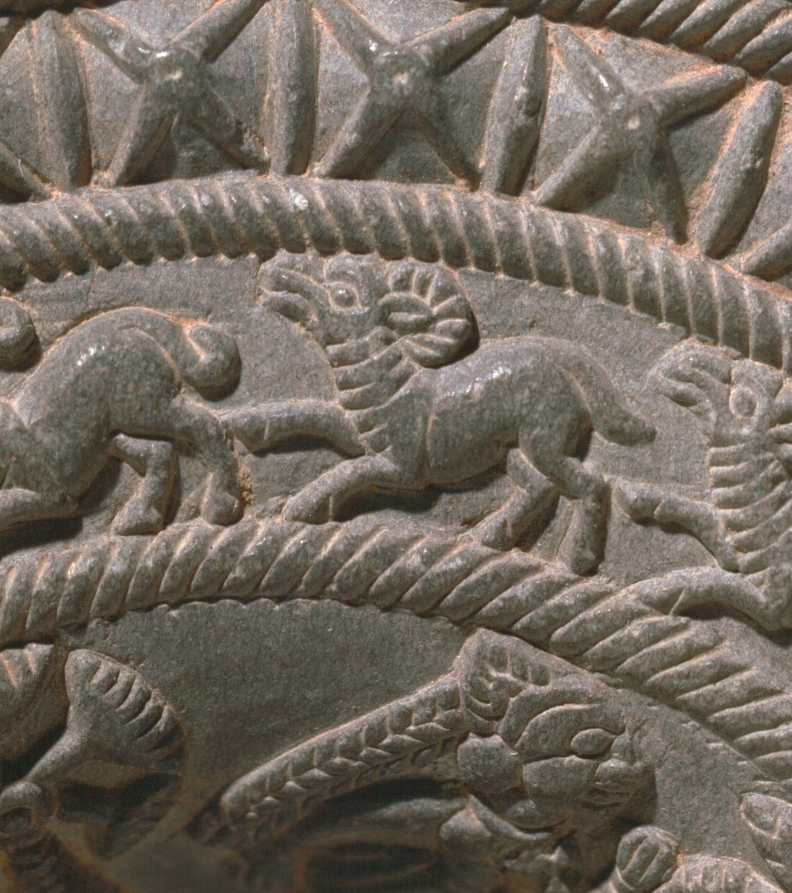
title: Ringstone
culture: India, Maurya period (322–185 BCE)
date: 200s BCE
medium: steatite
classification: Sculpture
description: Ringstones are among the earliest works of art to be created in stone during India's historical period. This example is finely carved with detailed images of affectionate couples and palm trees, running animals, and geometric motifs in concentric circles. The function of ringstones remains uncertain, since none of the surviving examples is inscribed or explained in a text.